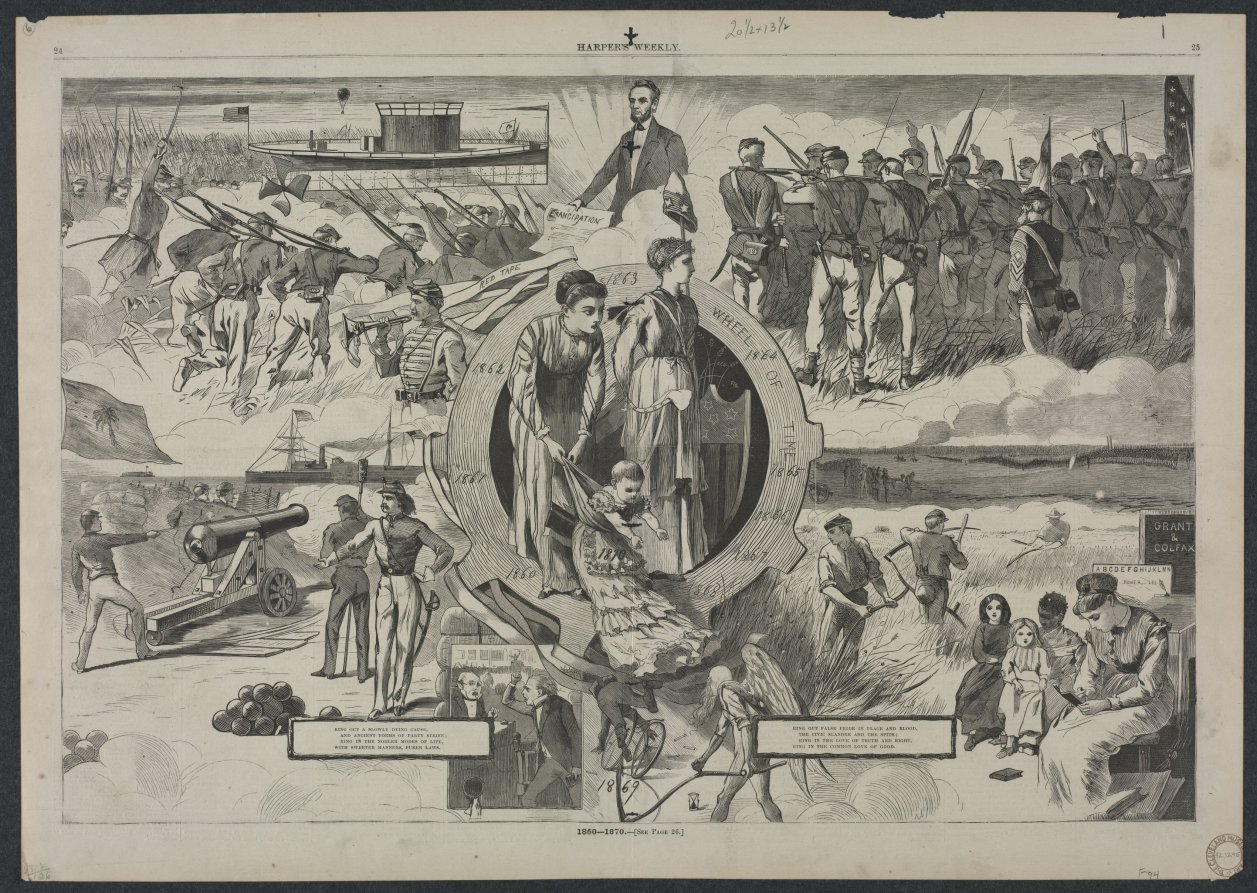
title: 1860 - 1870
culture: America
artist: Winslow Homer (American, 1836–1910)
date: 1870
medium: wood engraving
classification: Print